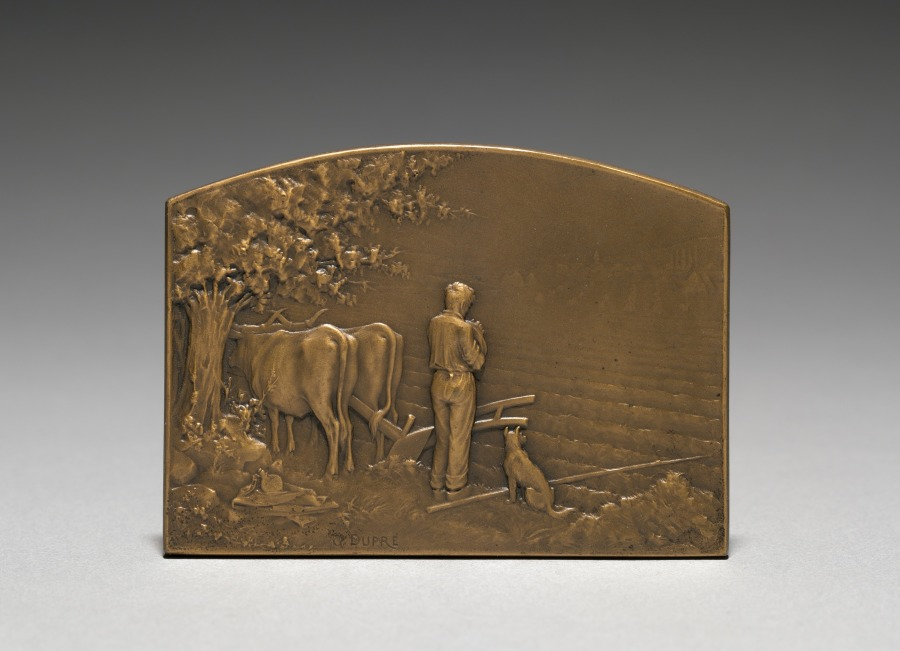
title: Medallion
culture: France, 19th-20th century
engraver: Georges Dupré (French, 1869–1909)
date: 1903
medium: bronze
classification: Metalwork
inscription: signed: "G. Dupré."